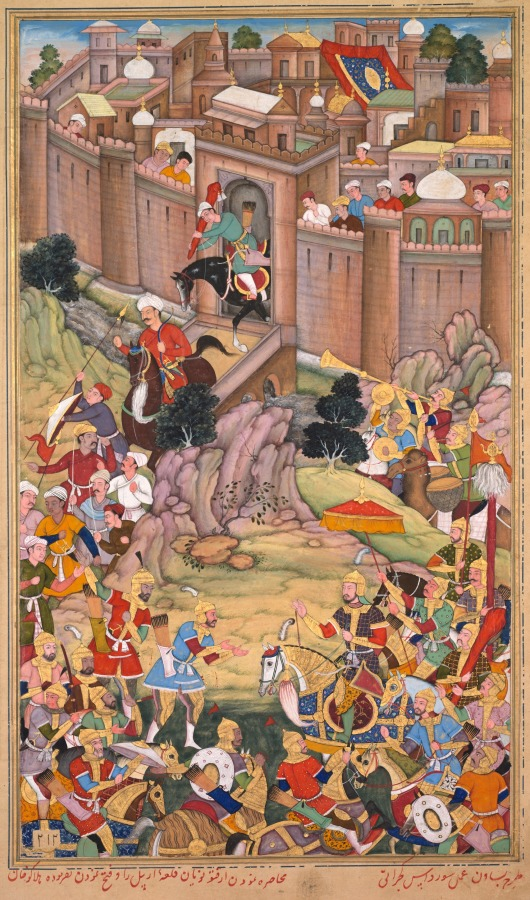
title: The siege of Arbela in the era of Hulagu Khan, page from a Chingiz-nama (Book of Chingiz Khan) of the Jami al-tavarikh (Compendium of Chronicles) of Rashid al-Din (Persian,1247–1318)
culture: Mughal India, court of Akbar (reigned 1556–1605)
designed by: Basavana (Indian, active c. 1560–1600)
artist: Sur Das (Indian)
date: c. 1596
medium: Gum tempera and gold on paper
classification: Painting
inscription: recto lower left: [translated] Siege of the fort of Irbil by Urgatu Nuyan and the attainment of victory by command of Hulagu Khan.; verso overall: [text]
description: A Mongol conqueror riding a white horse gazes stonily at his defeated West Asian opponent in a scene that took place more than 300 years before this painting was made. By the end of the 1500s there was a new emphasis on creating paintings to accompany historical texts. Visually, the diagonal composition with cityscape at the top of the page—also found among the earliest Mughal paintings—was expanded to include throngs of participants and a startling new naturalism. Painting from the Akbar period reached its maturity by the 1590s in works such as this: dynamic in composition and gestures but contained within organized spaces and emphasized three-dimensionality.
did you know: This fortified city in the heart of Kurdistan, now called Irbil, is in Iraq.